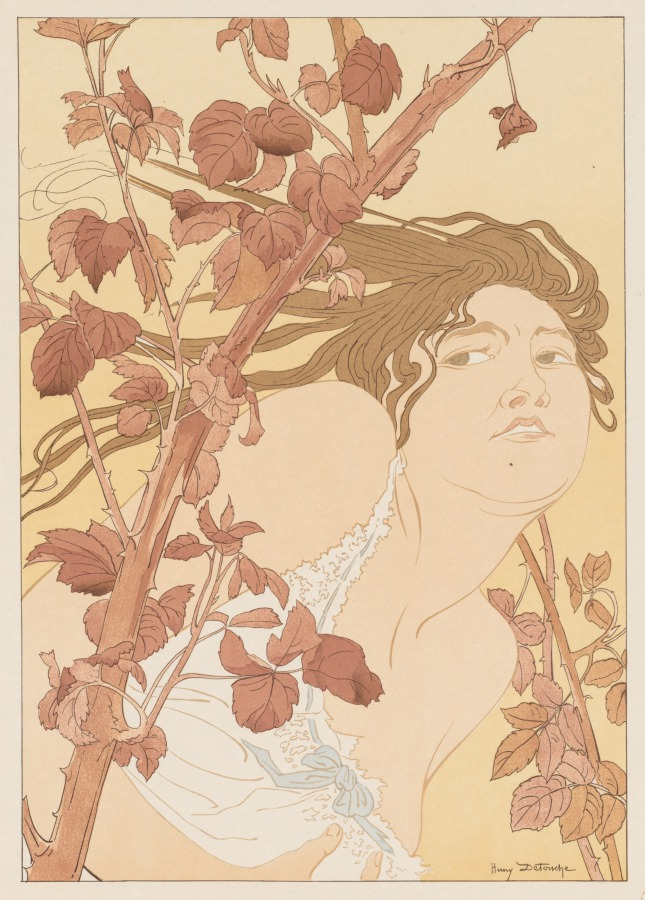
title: In the Brambles (Dans les Ronces)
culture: France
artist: Henri Detouche (French, 1854–1913)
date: 1898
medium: color lithograph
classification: Print